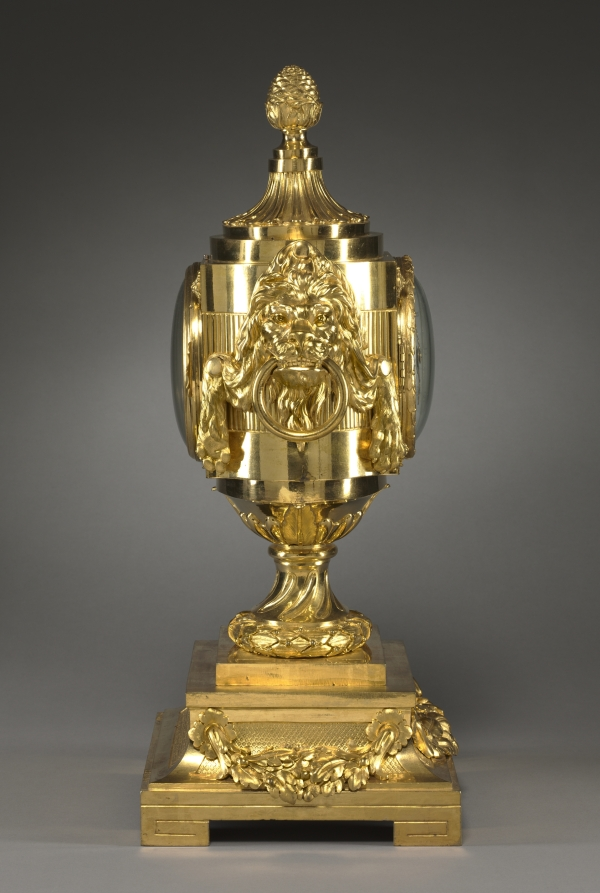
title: Clock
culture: France, 18th century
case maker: Robert Osmond (French, 1711–1789)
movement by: Robert Robin (French, 1742–1799)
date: c. 1785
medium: gilt bronze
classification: Furniture and woodwork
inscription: face of clock inscribed: "Robin ger Du Roi"